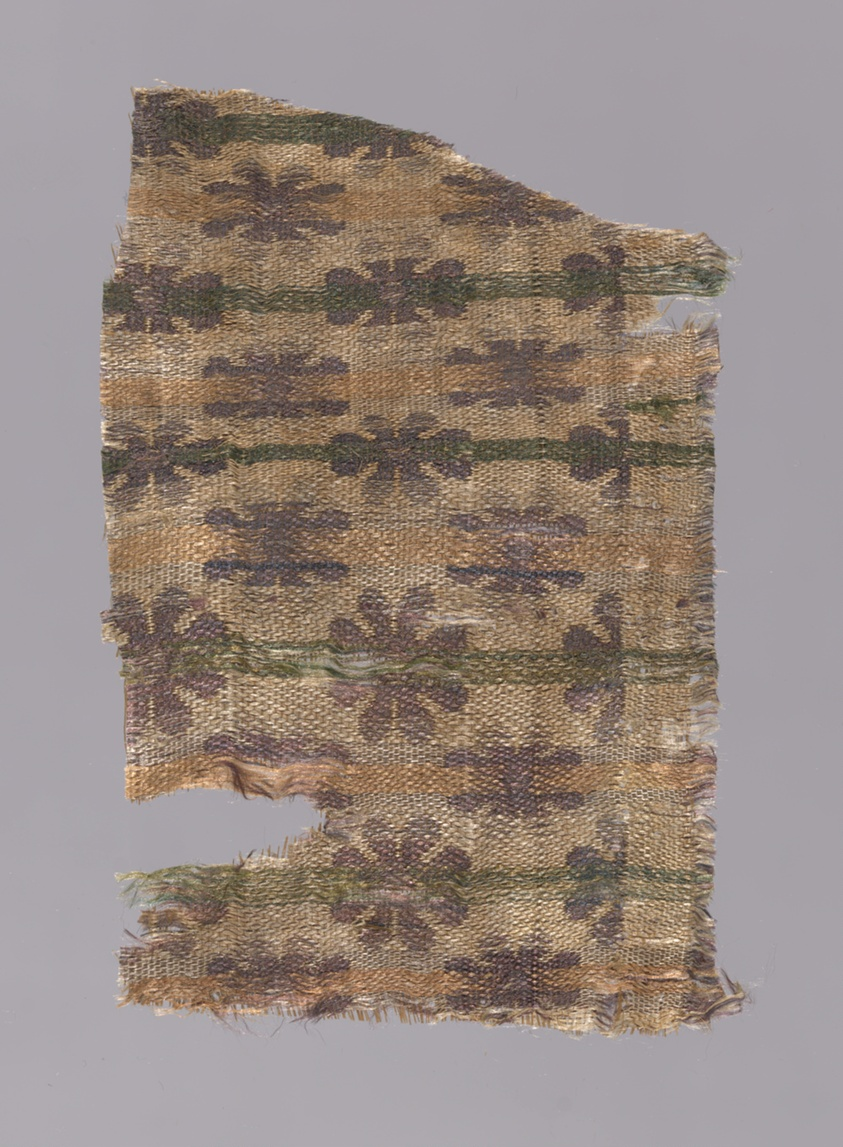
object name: Textile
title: Fragment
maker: Possibly France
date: 15th century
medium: Silk, three color complementary weft weft-float faced twill weave with inner warps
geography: France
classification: textile; weaving